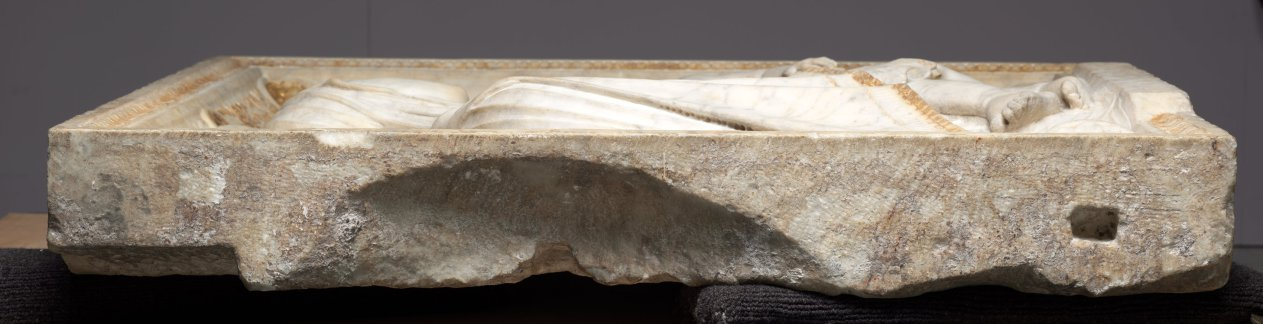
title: Madonna and Child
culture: Italy, Rome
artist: Mino da Fiesole (Italian, c. 1430–1484)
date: by 1461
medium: marble with traces of gilding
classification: Sculpture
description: This relief is one of four produced for the ciborium (canopy) erected by Cardinal Guillaume d'Estouteville over the high altar of the church of Santa Maria Maggiore in Rome. The ciborium was taken apart in 1747 and the other three panels--Christ Blessing, The Annunciation, and Saints Peter and Paul--were set into the walls of the sacristy.